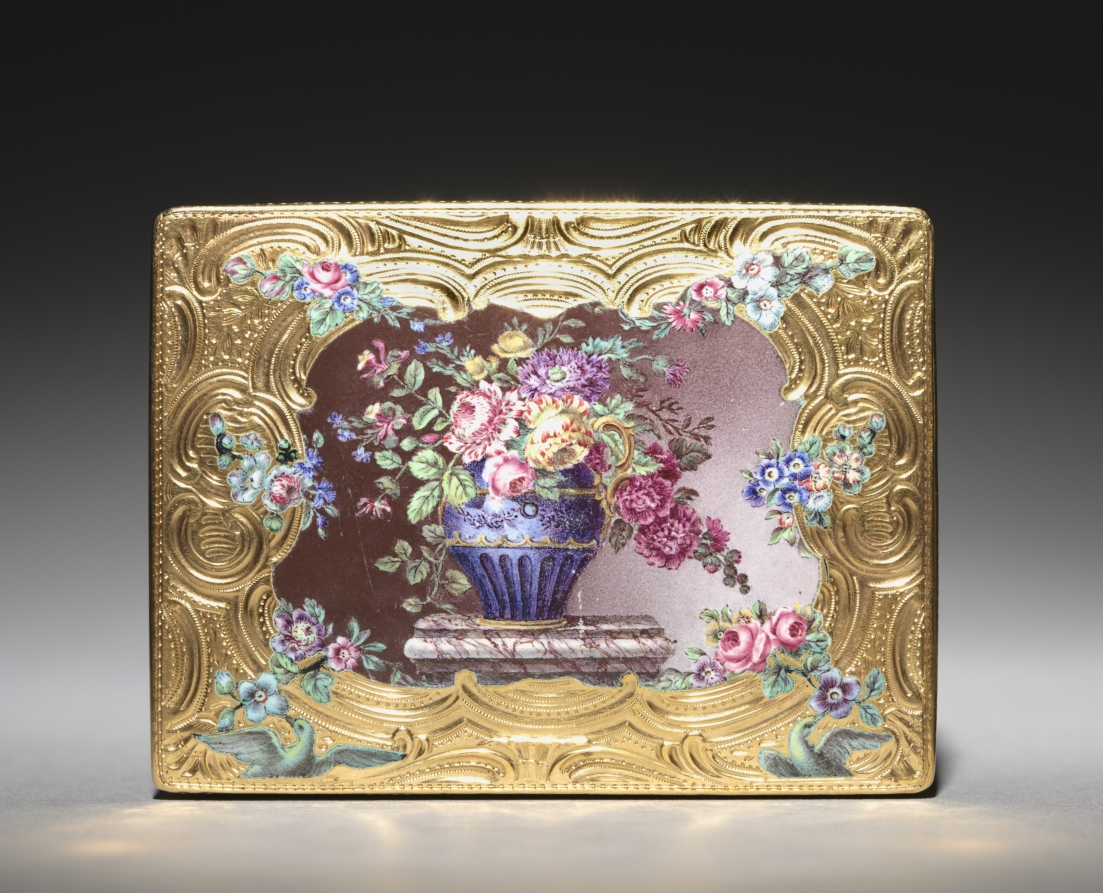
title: Snuff Box (Tabatière)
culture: France, 18th century (style of Louis XV)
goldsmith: Francois Guillaume Tiron (French)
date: 1756–57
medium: gold and enamel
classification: Miscellaneous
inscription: [Maker's mark of Francois-Guillaume Tiron, master goldsmith in 1747, inside cover; left wall]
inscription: [Warden's mark for Paris, 1756-1757, inside cover]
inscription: [Charge mark of Julien Berthe, Paris, 1750-1756, inside cover; left wall]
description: The miniature paintings that decorated snuff boxes were depicted in intricate detail requiring complex technical skill. This box’s miniatures are painted with enamel en plein, meaning the enamel has been applied directly to the metal of the box. A different enameling technique, basse-taille, is used to depict the doves and floral borders. Here, the gold has been chiseled away and filled with translucent enamel in order to produce a three-dimensional effect.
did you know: In the mid-1700s François-Guillaume Tiron worked alongside his brother, Jean-Marie Tiron, one of the most celebrated makers of gold boxes of the 18th century.